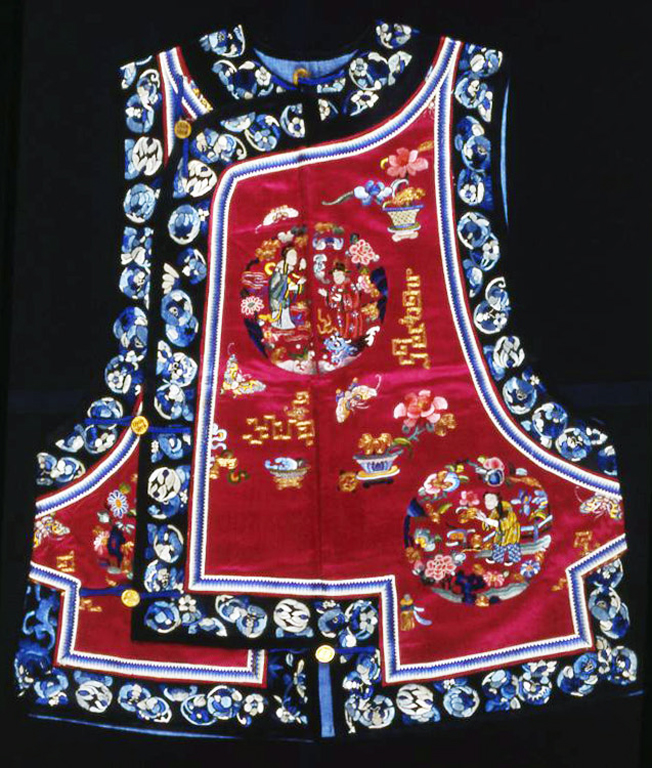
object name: Costume and Accessories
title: Woman's Vest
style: qing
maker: Manchu (China)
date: Qing dynasty (1644–1911), 1875/1900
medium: Silk, warp-float faced 7:1 satin weave; embroidered with silk and gold-leaf-over-lacquered-paper-strip-wrapped silk in satin, single satin, and stem stitches; laid work, couching and Chinese knots; inner tape: silk and cotton, plain weave self-patterned by main warp floats; outer tape: silk, warp-float faced 7:1 satin weave; embroidered with silk in satin and stem stitches; edged with silk, warp-float faced 7:1 satin weave; lined with silk, plain weave; button loops: silk, warp-float faced 7:1 satin weave; metal buttons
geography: China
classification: textile; needlework (visual works); weaving; costume